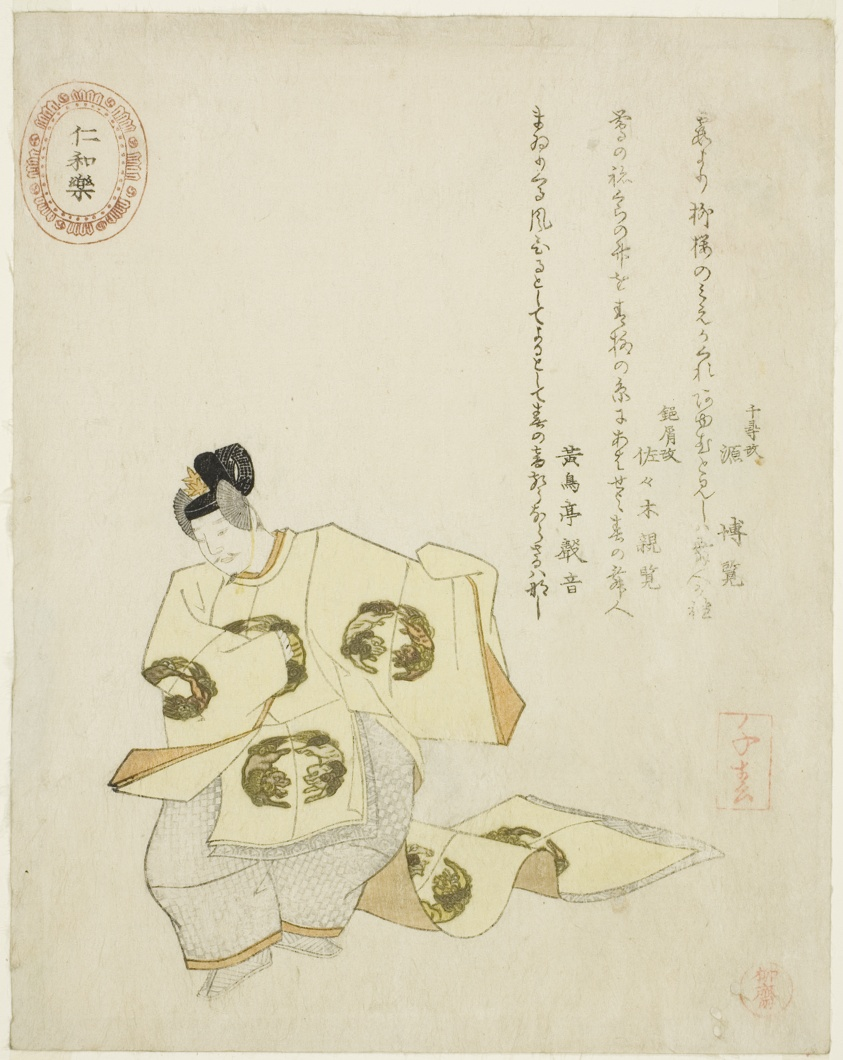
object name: Print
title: Ninnaraku, from an untitled series of No plays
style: Japanese (culture or style)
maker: Takashima Chiharu (Japanese, 1777-1859)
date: 1823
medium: Color woodblock print; shikishiban, surimono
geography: Japan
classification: woodblock print; print; asian art